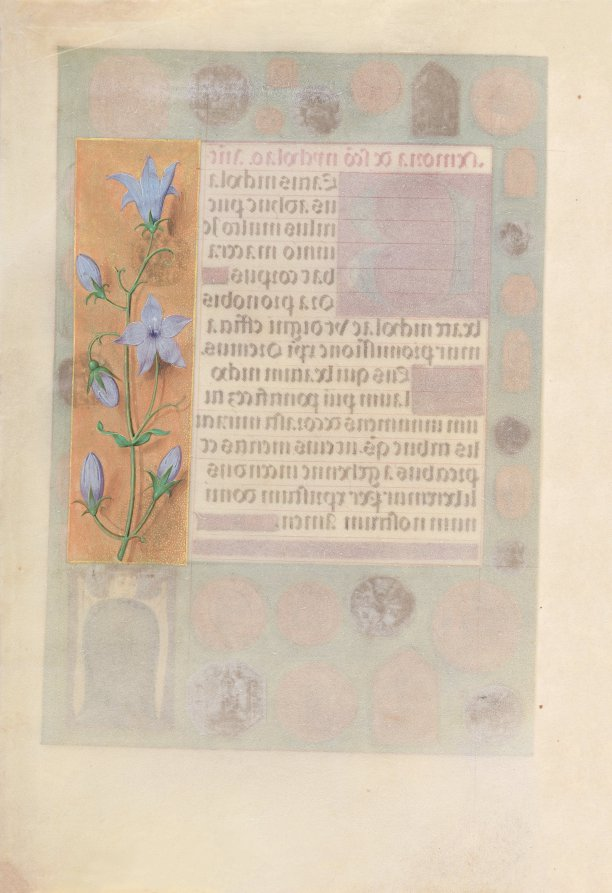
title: Hours of Queen Isabella the Catholic, Queen of Spain: Fol. 184v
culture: Flanders, Ghent and Bruges, late 15th century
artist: Master of the First Prayerbook of Maximillian (Flemish, c. 1444–1519)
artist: and Associates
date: c. 1500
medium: ink, tempera, and gold on vellum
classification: Bound Volume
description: This manuscript was illuminated by a circle of at least five highly organized manuscript painters active in the Flemish cities of Ghent and Bruges. The principal illuminator was Alexander Bening, who painted the majority of the book's miniatures. Manuscripts produced by this circle of artists are renowned for the decoration of their borders, which typically feature a rich variety of realistically-painted flowers, birds, and butterflies. This prayer book, called a book of hours, was intended not for a cleric, but for the private devotions of a lay person-in this case, Isabella the Catholic, Queen of Spain (1451-1504). Isabella's coat of arms embellishes the book's frontispiece. It is unlikely that the book was commissioned by the Queen herself; rather, she probably received it as a diplomatic gift from someone courting her patronage, perhaps Cardinal Francisco Jimenez de Cisneros. A Franciscan friar, Jimenez was dependent upon Isabella for his advancement, first to the post of Queen's confessor in 1492, and then to Archbishop of Toledo in 1495.